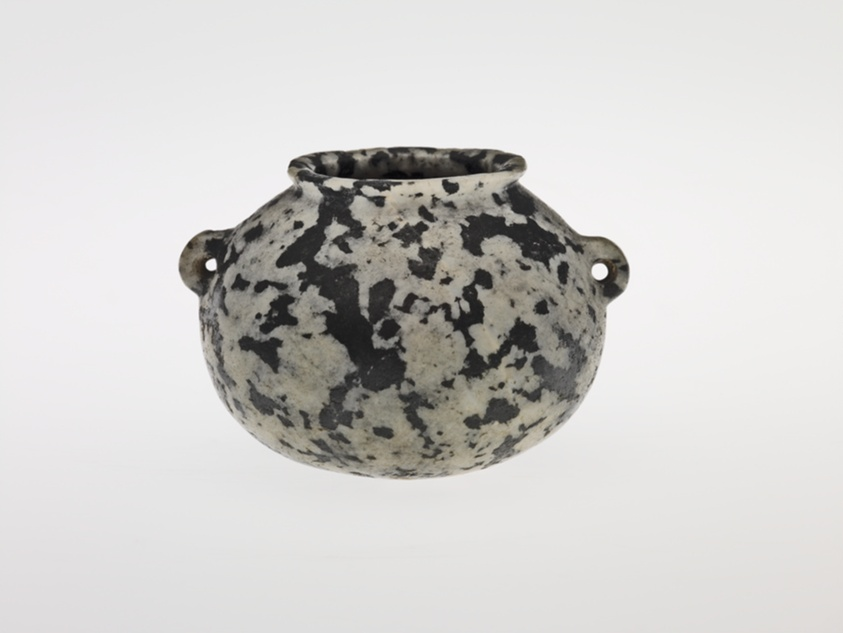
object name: Vessel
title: Jar with Handles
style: predynastic, ancient, egyptian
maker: Egyptian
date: Predynastic Period, Naqada II (about 3500–3200 BCE)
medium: Breccia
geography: Egypt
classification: vessel; stone; ancient art; container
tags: containers, dining, drinking